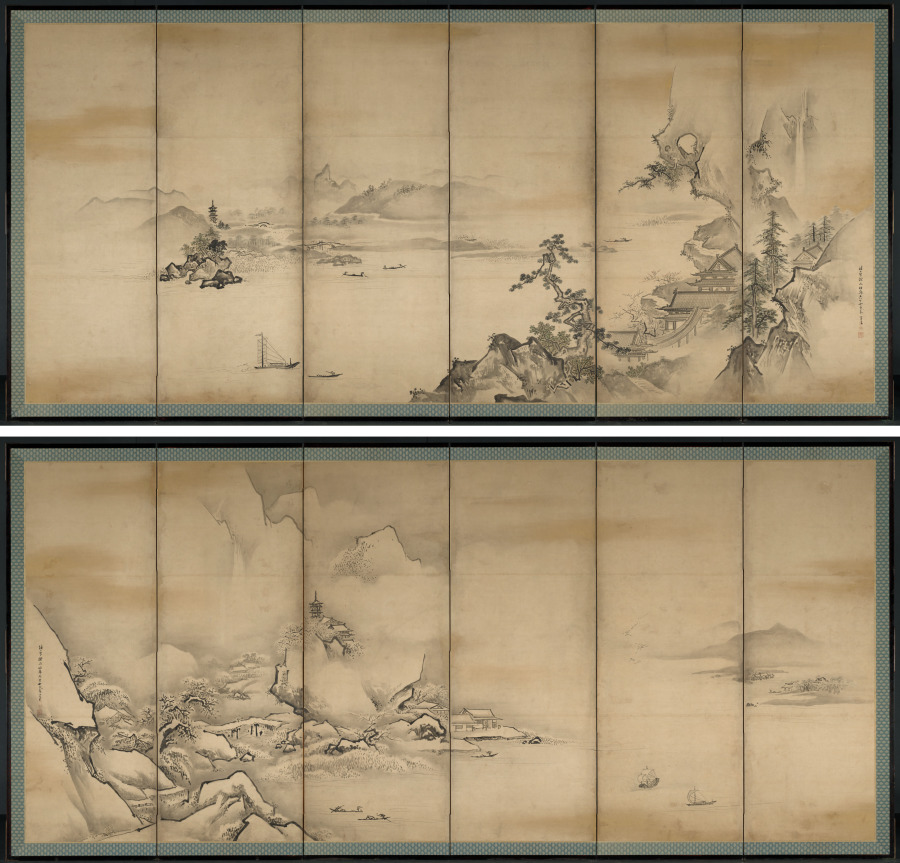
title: The Four Seasons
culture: Japan, Edo period (1615–1868)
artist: Kano Tan’yū (Japanese, 1602–1674)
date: 1668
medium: pair of six-panel folding screens, ink and slight color on paper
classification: Painting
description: Tan'yū's skills were honed early within the regimen of the Kano family's painting studio. His grandfather, Eitoku (1543–1590) was the Momoyama period's most sought-after painter, a champion of colorful, large-scale painting compositions who worked for several of the country's most powerful leaders. When the young Tan'yū was summoned to Edo in 1617 by the shogun to become a member of the new capital's official painting studio, few opportunities to work on similarly ambitious projects existed. Yet by the end of his career, Tan'yū had supervised the execution and installation of linked mural painting compositions in several of Japan's most prestigious residences and castles. As an official court painter to the first shogun, Tokugawa Ieyasu (reigned 1603–5), and then his successors, Tan'yū appears to have successfully juggled his official duties with private activities as a teacher, as the era's leading connoisseur of classic Chinese and Japanese painting, and as a practicing artist. His surviving compositions as well as thousands of sketches far surpass the oeuvre of any of his contemporaries. While studio assistants surely contributed to his oeuvre, just as later imitators consciously confused his accomplishments, a clearer image of the painter has emerged in recent years that better conforms with his contemporary acclaim as recorded in seventeenth- and eighteenth-century documents. Tan'yū can now be seen as an artist adept in virtually all traditional ink painting subject matter, which he often presented in novel interpretations. Equally important are his rare screen (byōbu) compositions executed in a pure yamato-e manner with vivid mineral pigments on a gold-foil background. This pair of byōbu presents Tan'yū's more orthodox approach to academic ink painting methods embracing Chinese themes that had been interpreted by numerous Japanese ink painters over the centuries. Thus a typical view of residences and human activities set along the shores of an impressive river (or lake) is enlivened by the Japanese proclivity for including seasonal references. Proceeding from right to left, the viewer passes sequentially from spring to the snow-laden branches of winter. Tan'yū lends considerable atmospherics to the panorama in his use of misty cloud banks, frequently set off by sharp, darkened ink lines or whole areas of ink washes of variegated tonalities. The spring and summer views are particularly notable in this regard, as is the presence of the artist's signature on both byōbu, attesting to their completion in Tan'yū's sixty-seventh year (1668)—50 years after he left Kyoto for the capital, and 30 years following his adoption of the artist name "Tan'yū" (in 1635). From 1622, when he began work on the mural paintings for Edo castle (the shogun's formal residence), through the completion of the painting cycle in 1636 for the Tokugawa family mausoleum in Nikkō to the north of Edo, Tan'yū's skills as head of an accomplished painting studio as well as a master painter found their most impressive expression in large-scale compositions. In 1638 he received the honorary Buddhist title Hōgen (Eye of the Law). It is intriguing therefore that relatively few independent byōbu paintings from the master's hand survive, particularly documented early works.